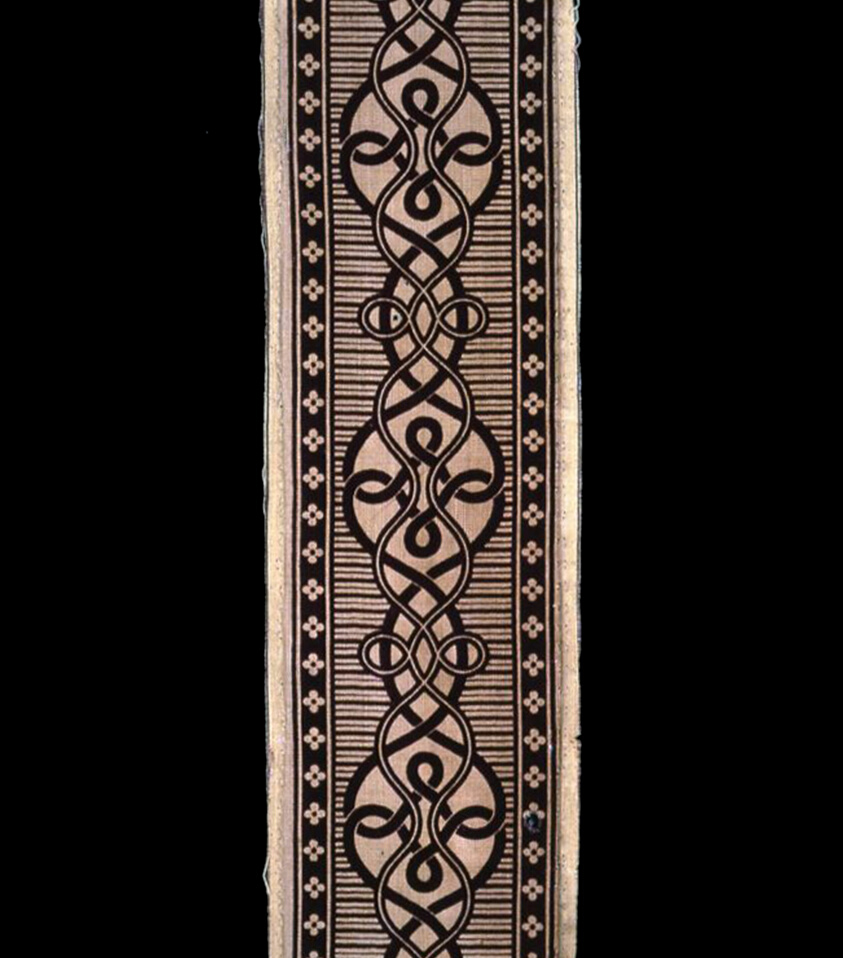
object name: Textile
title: Border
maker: England or United States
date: 19th century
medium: Cotton, plain weave; block printed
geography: England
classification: textile; weaving - printed